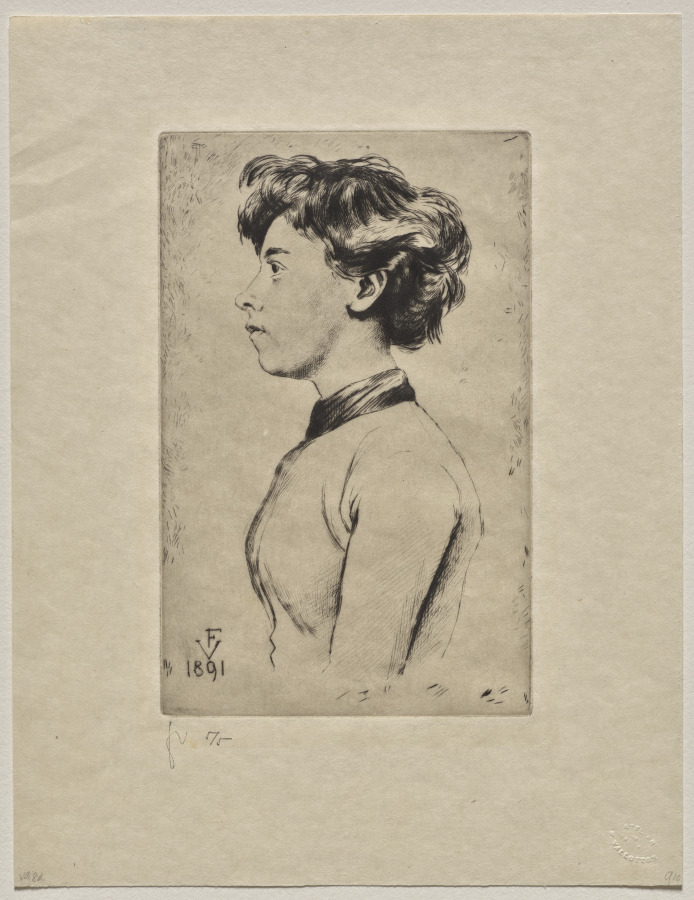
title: Young Girl in Profile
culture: Switzerland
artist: Félix Vallotton (Swiss French, 1865–1925)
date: 1891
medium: drypoint on ivory wove paper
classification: Print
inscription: initialed and inscribed, lower left on plate: FV / 1891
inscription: stamped, in black ink, lower left: fv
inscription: inscribed, in pencil, lower left: 5/5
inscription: blind stamped, lower right: atelier stamp [Lugt 2478b]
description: This print depicts Hélène Chatenay, a seamstress who became Félix Vallotton’s partner during the 1890s. The two lived together in Paris’s Latin Quarter until Vallotton abruptly married Gabrielle Rodrigues-Henriques in 1899 and assumed her haut bourgeois lifestyle. During their years together, Chatenay was a frequent model for Vallotton and the profile view seen here was also realized as a drawing two years earlier.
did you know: Although well known for his woodcuts, Félix Vallotton made only 23 etchings, all around 1890. He began by making copies after Rembrandt and other past masters in the late 1880s before moving on to his own subjects, mostly figures and cityscapes.